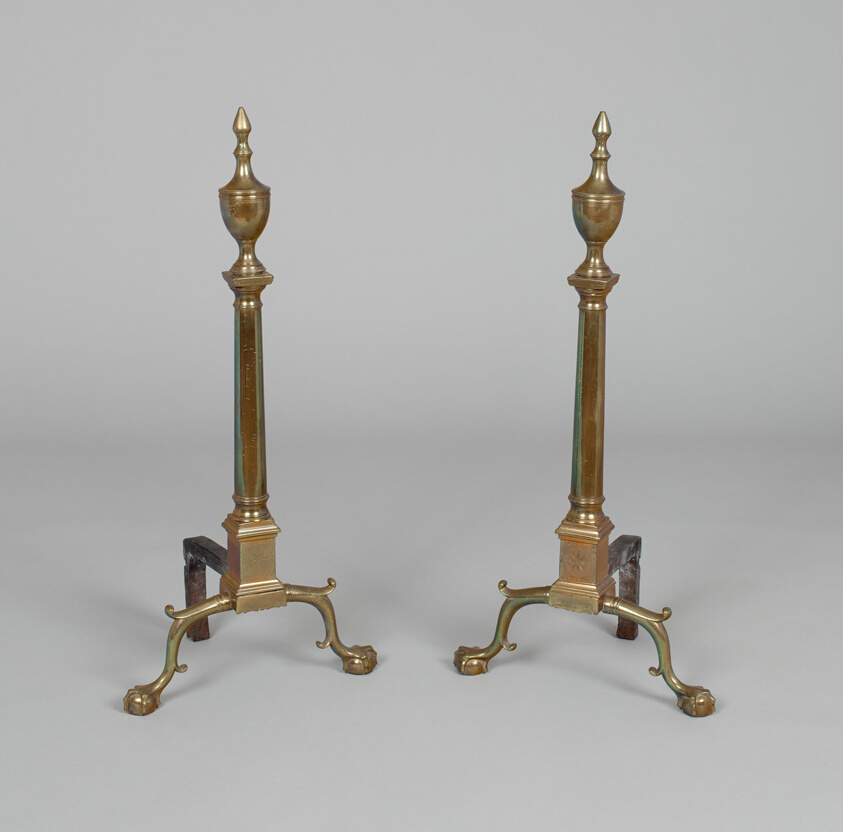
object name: Decorative Arts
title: Andirons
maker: Artist unknown (American, 18th century); Probably New York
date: c. 1790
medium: Brass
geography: New York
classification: fireplace equipment; furniture accessory; american decorative arts; american arts; decorative arts